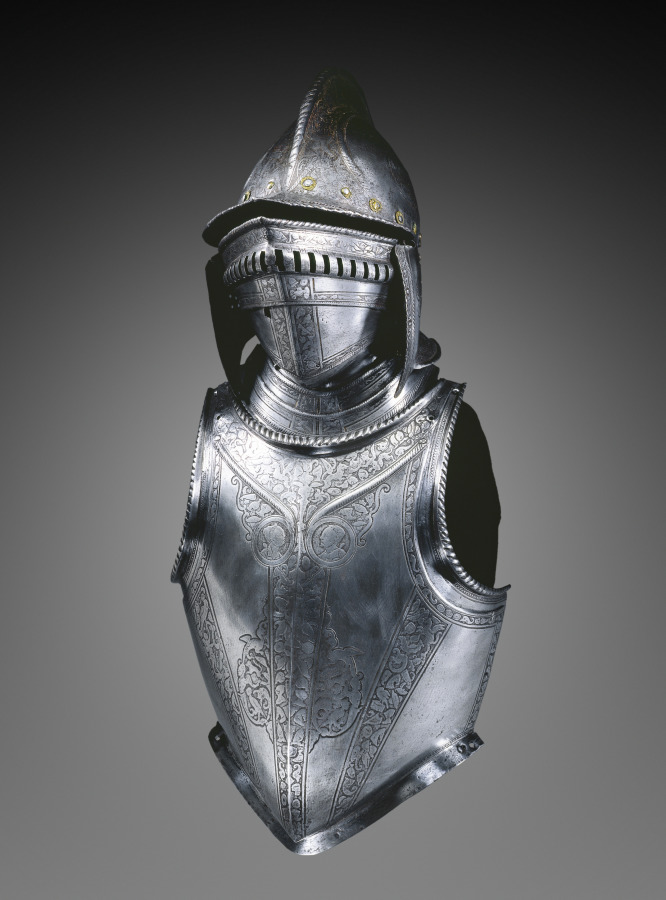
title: Breastplate with Etched Bands of Trophies and Medallions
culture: North Italy, 16th century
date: c. 1550–1600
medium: etched steel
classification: Arms and Armor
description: Shown here together is a burgonet, buffe, and breastplate all decorated with a technique known as etching. A burgonet is a light open helmet characterized by a peak, a fall over the eyes, and hinged earpieces. The face is protected by the addition of a buffe, a sperate detachable element worn with the open helmet that extends to the throat. It connects to the breastplate which protects the abdomen and is worn with a backplate.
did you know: Etching is a technique where either the design or its ground is bitten into the metal surface with acid, the rest being protected by a protective wax or varnish.